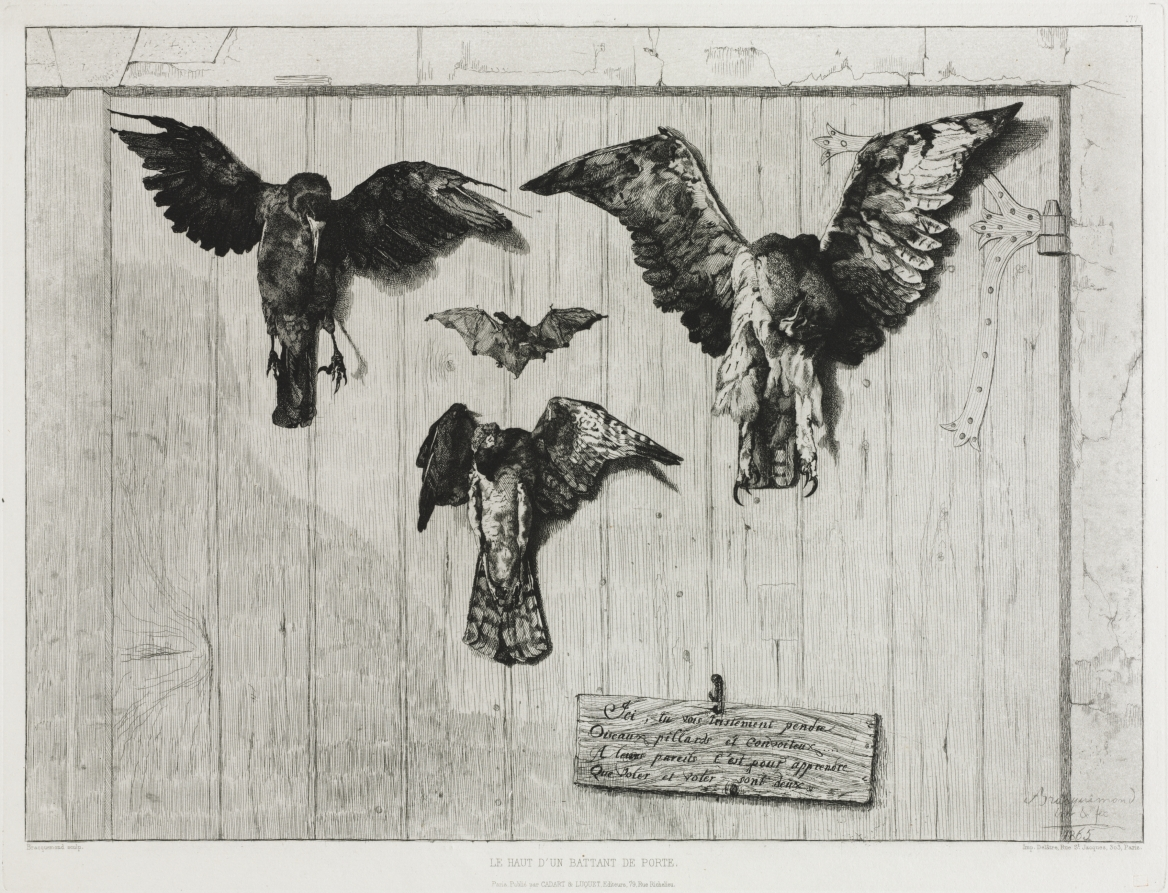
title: The Top of the Swing-Door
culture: France, 19th century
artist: Félix Bracquemond (French, 1833–1914)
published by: Cadart & Luquet 79, rue Richelieu, Paris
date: 1852 (printed 1865)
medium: etching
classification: Print